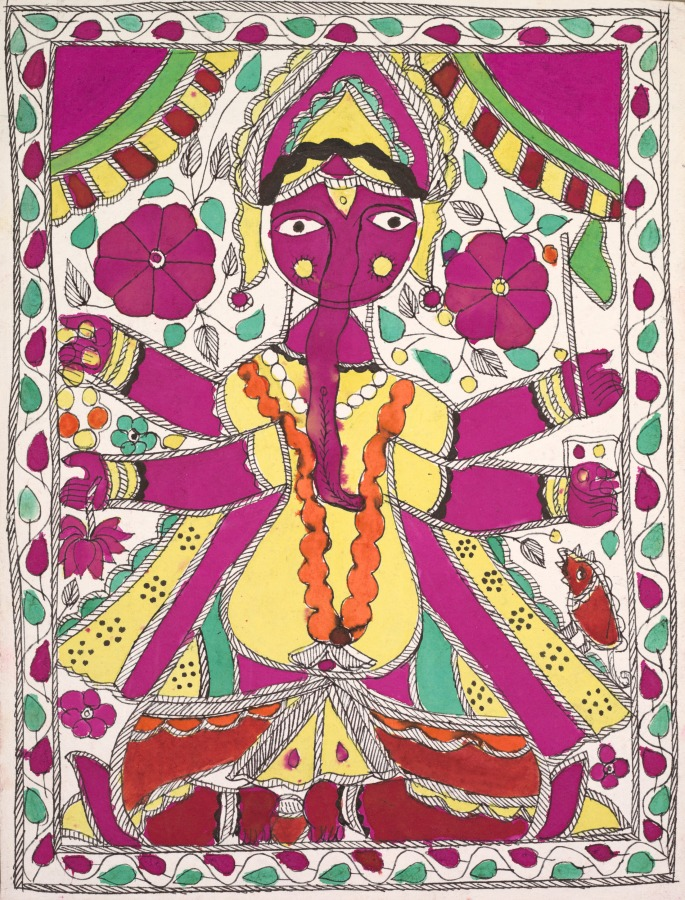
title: Large, multi-armed figure facing out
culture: Eastern India, Bihar State, Mithila or Madhubani School, 20th century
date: 1900s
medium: ink and color on paper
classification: Painting